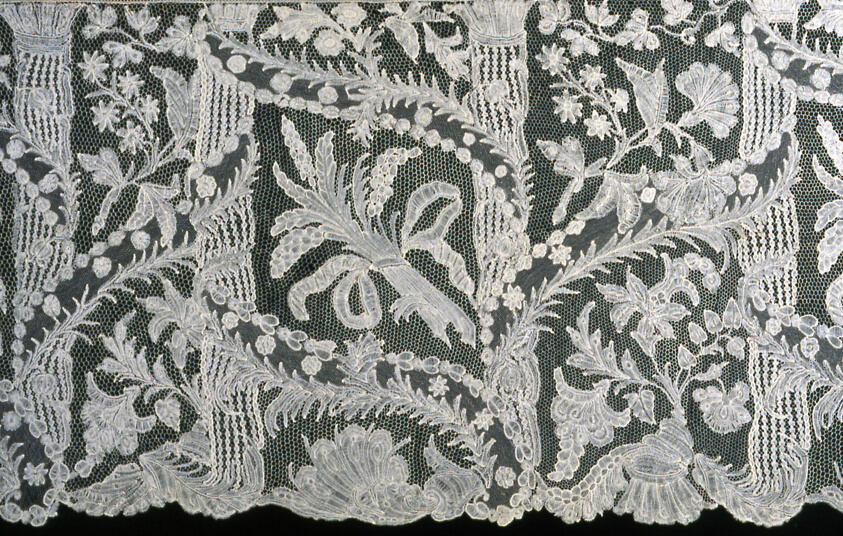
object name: Textile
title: Flounce (Furnishing)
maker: Belgium, Flanders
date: 1750/75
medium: Linen, bobbin part lace of a type known as "Brussels" with an imitation of needle made mesh, "Point d'Alençon," ground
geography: Flanders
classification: textile; lace - bobbin; lace